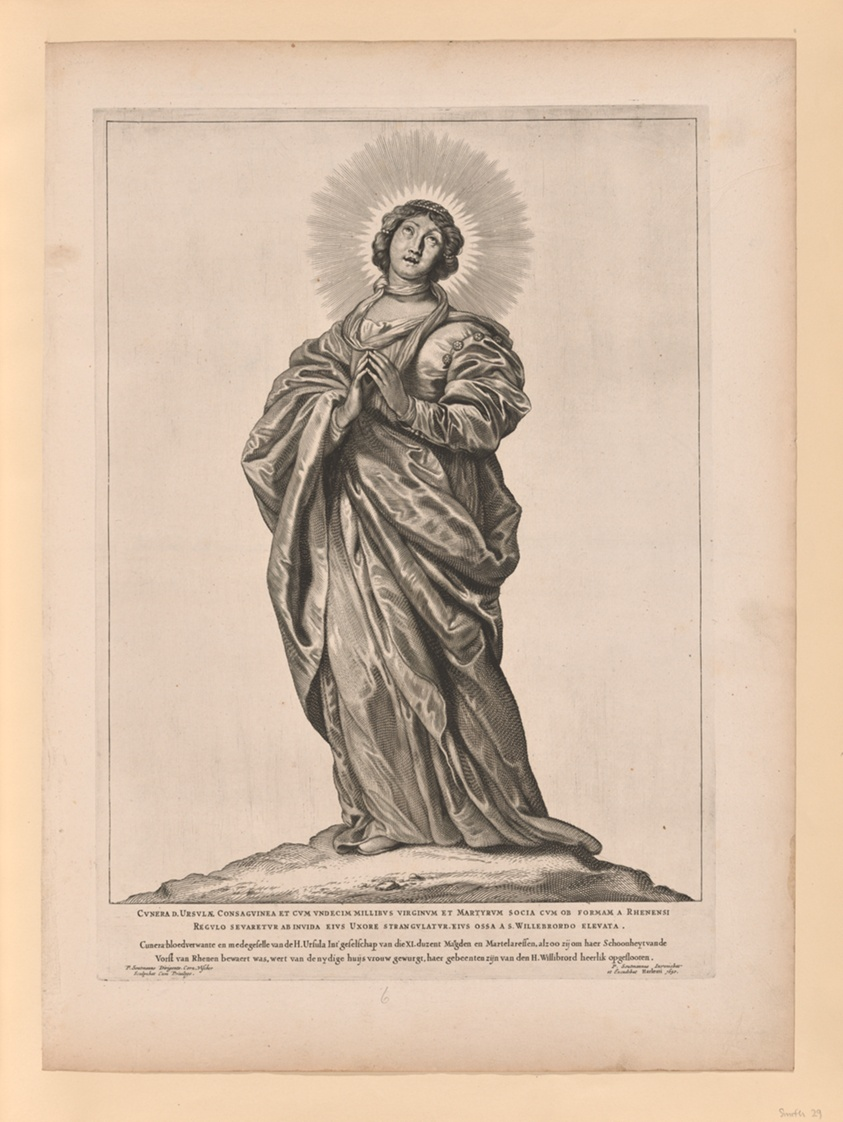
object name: Print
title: Saint Cunera, from Saints of the North and South Netherlands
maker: Cornelis Visscher (Dutch, c. 1629-1658); after Pieter Claesz. Soutman (Dutch, c. 1580–1657)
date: 1650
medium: Engraving on paper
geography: Netherlands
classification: engraving; paper; print; prints and drawing